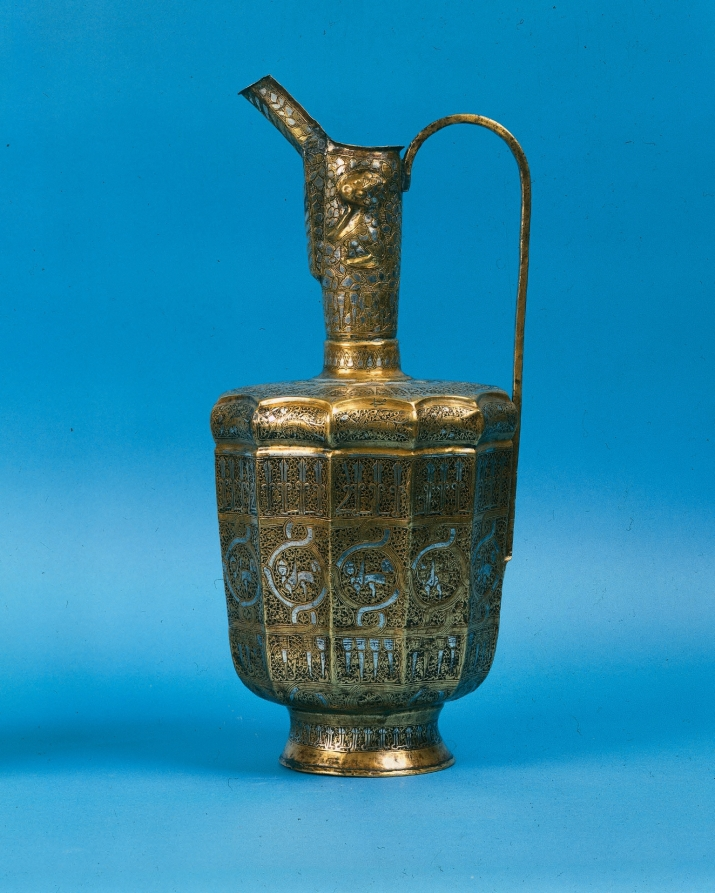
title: Twelve-sided Ewer with Sphinxes and Human-Headed Inscriptions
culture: Iran, Khurasan, Ilkhanid period (1256–1353)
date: 1300–1350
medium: hammered sheet of brass inlaid with silver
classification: Metalwork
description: The spout and neck of the ewer display a crouching and seated lion in raised relief. Winged hare-like animals march around the top of the body, set off by foliate scrolls, while sphinxes process around the center. The bottom of the ewer’s body is encircled by an inscription with human heads, which only appear on metalwork in Islamic art. Ewers like this, and similar elaborate vessels, would have been used in court banquets and elite homes across the Islamic world.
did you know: Calligraphy with human heads, known as animated script, developed in northeast Iran during the 1100s.